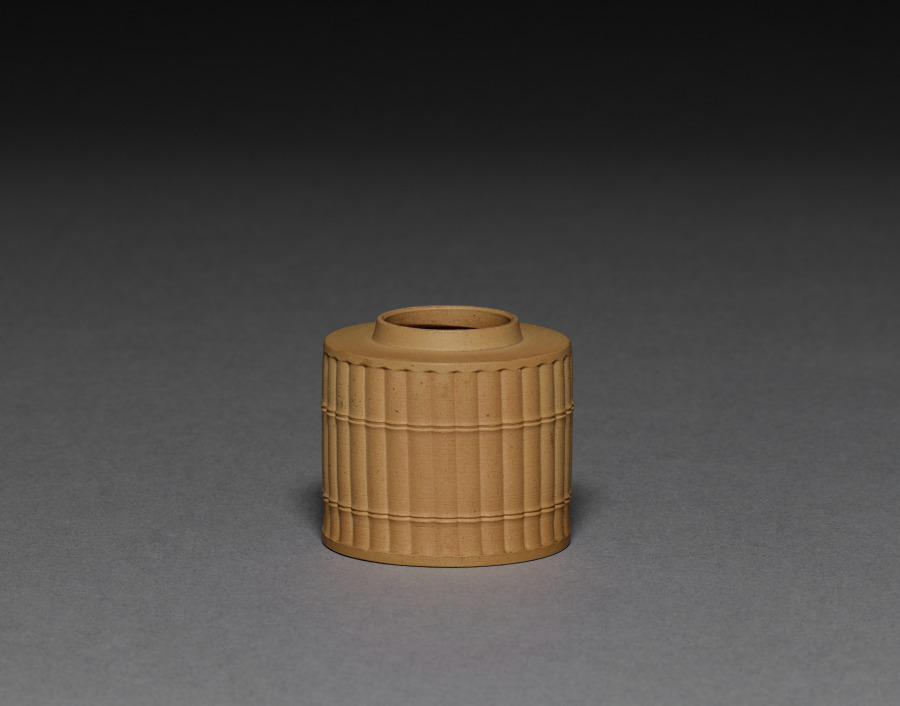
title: Caneware Jar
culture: England, Staffordshire, 18th century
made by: Wedgwood Factory (British)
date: c. 1795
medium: stoneware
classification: Ceramic